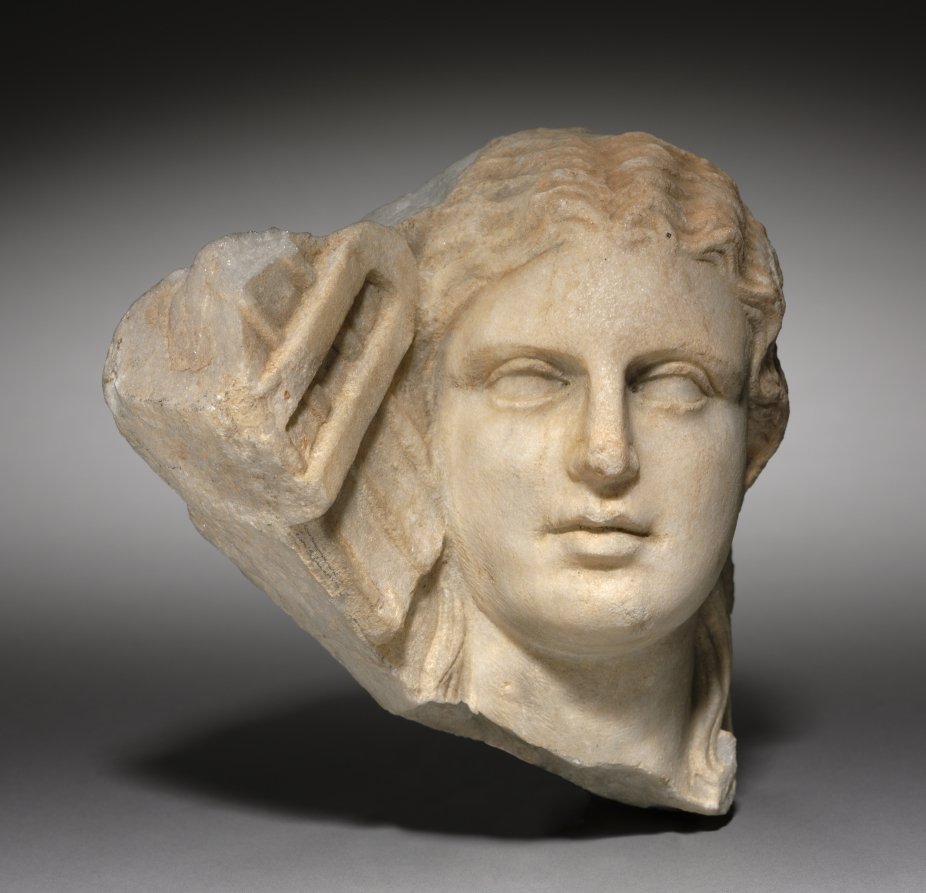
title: Head of a Woman Holding a Sistrum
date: 150 BCE–50 CE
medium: marble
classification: Sculpture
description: This head of a woman was likely originally part of a stele or grave marker. The woman sits in partial profile holding a sistrum close to her head, possibly making music. A sistrum is a type of rattle that originated in ancient Egypt and spread to the Greek world. (View a sistrum in the collection here: 1920.1990.) The sistrum likely signaled to ancient viewers that the woman on the grave marker was a worshiper of the Egyptian goddess Isis, whose cult spread throughout the Mediterranean after Alexander the Great took over Egypt.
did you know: A sistrum (rattle) can have either three or four branches through the body of the instrument.